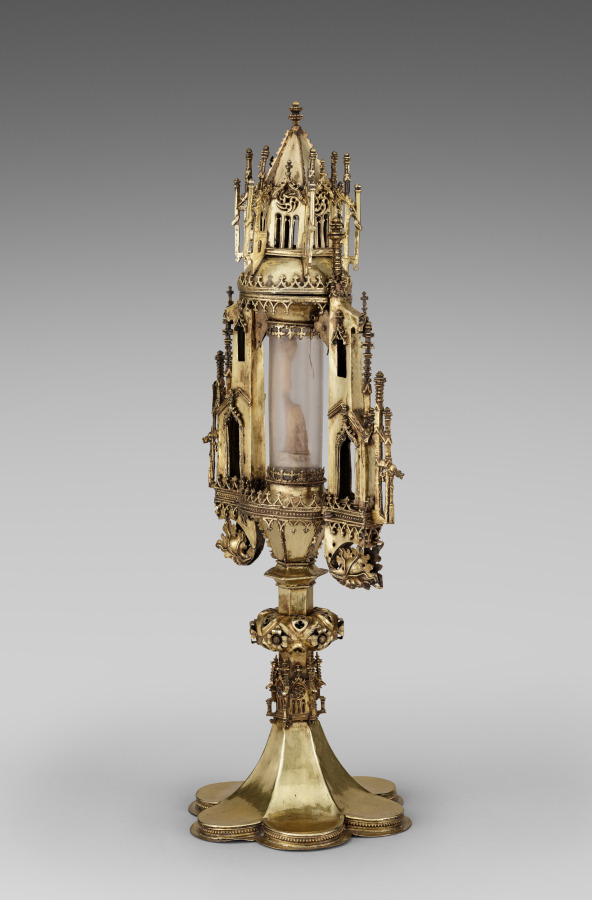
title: Monstrance with a Relic of Saint Sebastian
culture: Germany, Lower Saxony, Brunswick, Gothic period, 15th century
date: 1484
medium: gilded silver, rock crystal, bone, parchment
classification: Metalwork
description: This Late Gothic monstrance (from the Latin monstrare, "to show") is mentioned in the earliest inventory of Saint Blaise as "a large new monstrance containing relics of Saint Sebastian the martyr." Judging from surviving receipts, the reliquary was made by Werner Korff, a local goldsmith, who received payments for silver and gilding at the end of 1484. The reliquary was first displayed on the altar of the church of Saint Blaise in a solemn penitential mass on June 4, 1484, in an effort to ward off the plague. A recent examination revealed that the relic is a human metatarsal bone (one of five long bones of the human foot) and that its owner seemed to have suffered from periostitis, a medical condition that affects the connective tissue surrounding the bone.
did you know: In the Middle Ages, people suffering from diseases might make a journey, or pilgrimage, to venerate relics such as this one. The faithful believed that the remains of saints and holy people like Saint Sebastian could help those seeking aid such as relief from the plague.